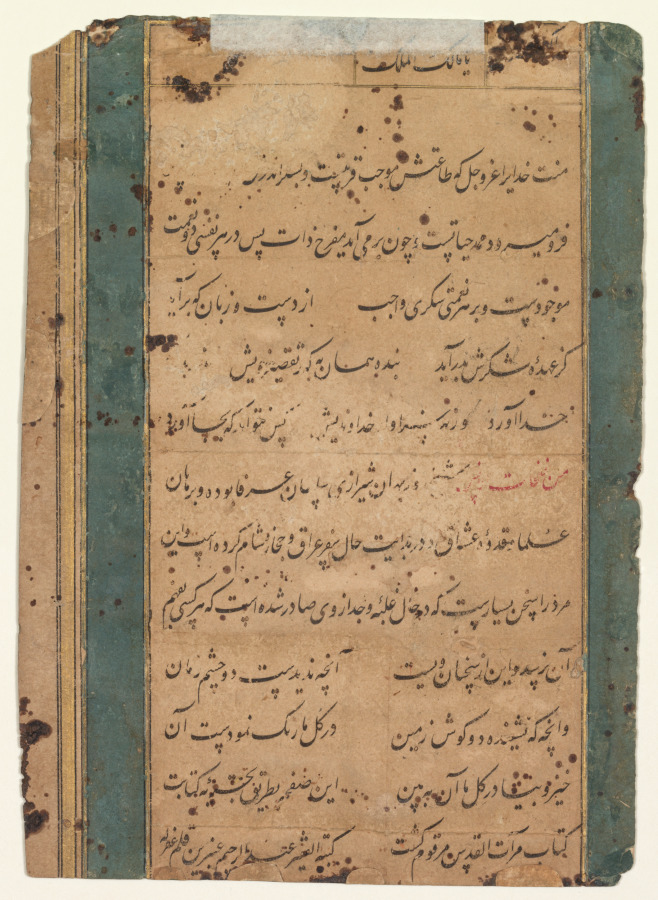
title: Page from the Mirror of Holiness (Mir’at al-quds)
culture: Mughal India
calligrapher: Abd al-Rahim, the Anbarin-Qalam (Indian, active c. 1590–1630)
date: c. 1605–10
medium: gum tempera, ink, and gold on paper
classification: Painting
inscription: Verso: A tahshiyya (marginal addendum) in rhymed prose from the Gulistan (Rose Garden) of Sa‘di (Persian, 1210–1291) and the Nafahat al-Uns (Breaths of Fellowship) of Abd al-Rahman Jami (Persian, 1414–1492), c. 1605, Abd al-Rahim, the Anbarin-Qalam (Indian, active c. 1590–1630), Mughal court; In nast’aliq script: O Lord of the all dominions Praise and thanks to God—may he be honored and glorified!—whose worship brings one closer to him and giving thanks [to him] increases his bounty. [Each breath] that one inhales, prolongs life, and when exhaled a rejuvenation of the soul. Thus each breath contains two blessings, and on each blessing gratitude is due. Who is able, by word or deed, to fulfill the task of paying him due thanks? It is more apt for his slaves to seek at the Divine court pardon for their shortcomings, for what truly is worth his lordship none can render adequately. Persian verses from the Nafahat al-uns quoting a poem by the mystic Sheikh Ruzbihan of Shiraz (Persian, 1128–1209), in nast’aliq script: That which has not been visible to the eye of time; That which has not been audible to the ears of the earth; Has manifested itself in the clay of my being. Come at once and see it in my clay.This page has been written as marginalia to the book Mir’at al-quds [Mirror of Holiness],written by the wretched Abd al-Rahim Anbarin-Qalam, may God forgive his sins.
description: According to Akbar's court historian, the emperor ordered likenesses to be taken of the grandees of his realm. "An immense album was thus formed: those that have passed away have received a new life, and those who are still alive have immortality promised them." Akbar's son and successor, Jahangir (reigned 1605-27), continued the tradition of commissioning works of lifelike portraiture for inclusion in imperial albums. This courtier wears an opulent fur-trimmed, fringed velvet coat over his belted white tunic and striped pants-the typical Mughal dress derived from their roots among the nomadic horse-riding people of Central Asia. The artist has reveled in creating the soft textures of the facial hair, fur and fabrics. He holds a ruby-like gemstone called a spinel, which was prized among the Mughals for its talismanic properties of protection during battle.